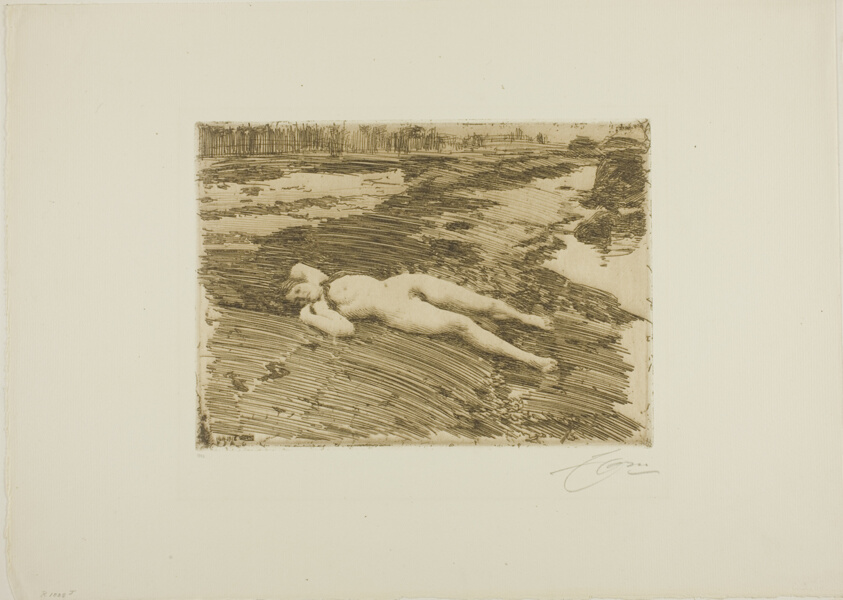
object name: Print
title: On the Sands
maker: Anders Zorn (Swedish, 1860-1920)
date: 1916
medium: Etching on ivory laid paper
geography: Sweden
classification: etching; print; prints and drawing